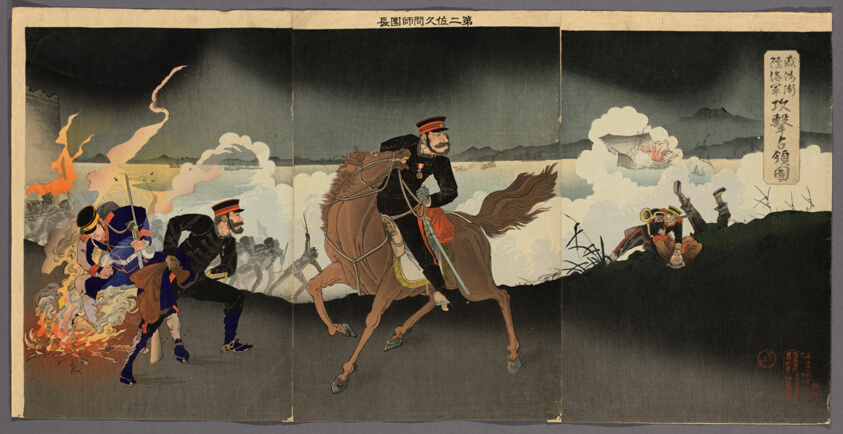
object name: Print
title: The Army and Navy Attack and Capture Weihaiwei (Ikaiei rikukaigun kogeki senryo zu)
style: Japanese (culture or style)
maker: Kobayashi Ikuhide (Japanese, active c. 1885–98)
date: 1895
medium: Color woodblock print; oban triptych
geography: Japan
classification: woodblock print; print